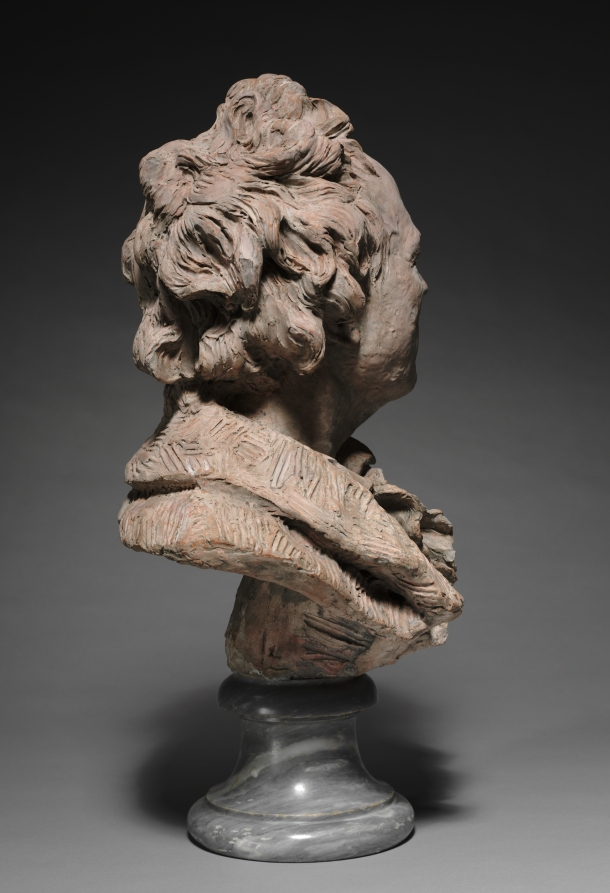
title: Portrait of Christoph Willibald Gluck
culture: France, 18th century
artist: Jean-Antoine Houdon (French, 1741–1828)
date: c. 1775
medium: terracotta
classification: Sculpture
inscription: inscribed in plaster fill in back at bottom: Houdon FT 177[4?]. Since this inscription was clearly added after the terracotta was fired, it cannot be considered a signature.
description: A well-known composer of the 1700s, Gluck reformed opera by bringing unprecedented simplicity and sincerity to his music and staging, qualities shared by Houdon’s bust. This portrait, by depicting Gluck’s pockmarked face, was perceived as a natural and truthful representation. Yet, he would never have appeared publicly with unkempt hair and an open collar, which constituted the standard for representing an artist.